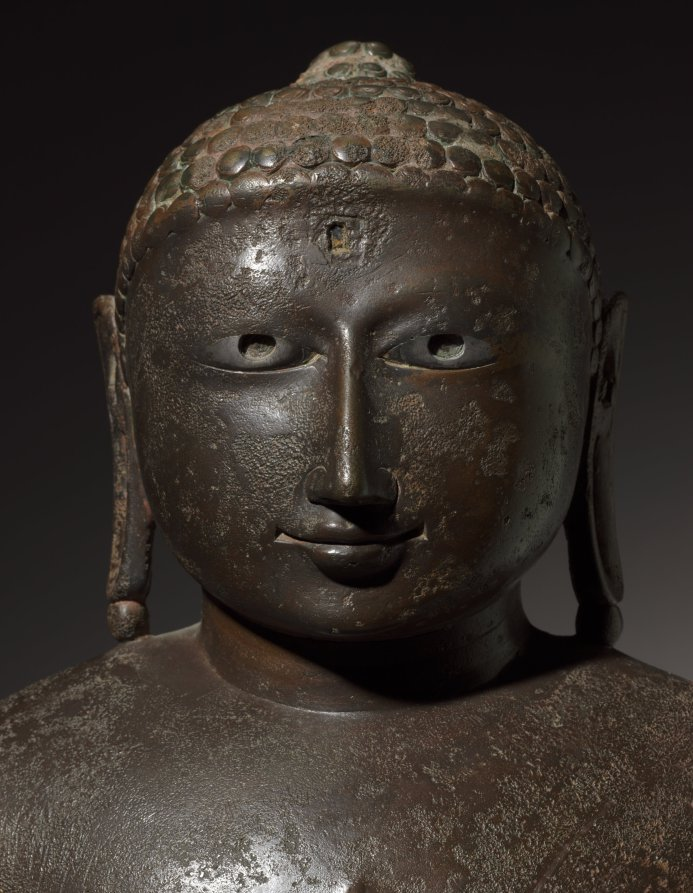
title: Jina (Tirthankara)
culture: India, Rajasthan, Medieval period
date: 900s–1000s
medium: bronze with silver inlay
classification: Sculpture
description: Jainism was one of the three major religions to evolve in India, the other two being Hinduism and Buddhism. While each religion developed its own particular characteristics, their beliefs maintained a common ground with Hinduism. In both Jainism and Buddhism, deities symbolize enlightened beings whose example is meant to inspire believers in following the path toward salvation rather than worshipping them. In Jainism the most common deities are Jinas (meaning "liberators" or "victors"), also known as Tirthankaras ("holy men"). As the name implies, they are beings "liberated" through enlightenment from the cycle of rebirth. There are 24 of these Jain patriarchs. This sculpture represents one of the 24 Jinas, but the absence of attributes makes it impossible to determine which one. This is not surprising since Jinas tend to look alike. Although this figure wears a cloth around his waist, Jinas are usually shown naked—a reference to their renunciation of worldly goods—and seated cross-legged in the posture of meditation (dhyanasana) with their hands resting in their laps (in the dhyana mudra), palms turned upward. Their physical appearance is always the same: broad shoulders, tapering torso, and long, highly stylized limbs. The head, with its round face and short-cropped curls, has a small protrusion at the top. The facial expression conveys self-assurance, wisdom, and compassion. Such a figure would usually have a halo attached to the back of the head. The present bronze dates to a time when some of the finest Jain sculptures and monuments were produced in India, as documented by such temples as Mt. Abu in Rajasthan (the area where this sculpture originated), Khajuraho in Madhya Pradesh, or Srivana Belgola in Karnataka.